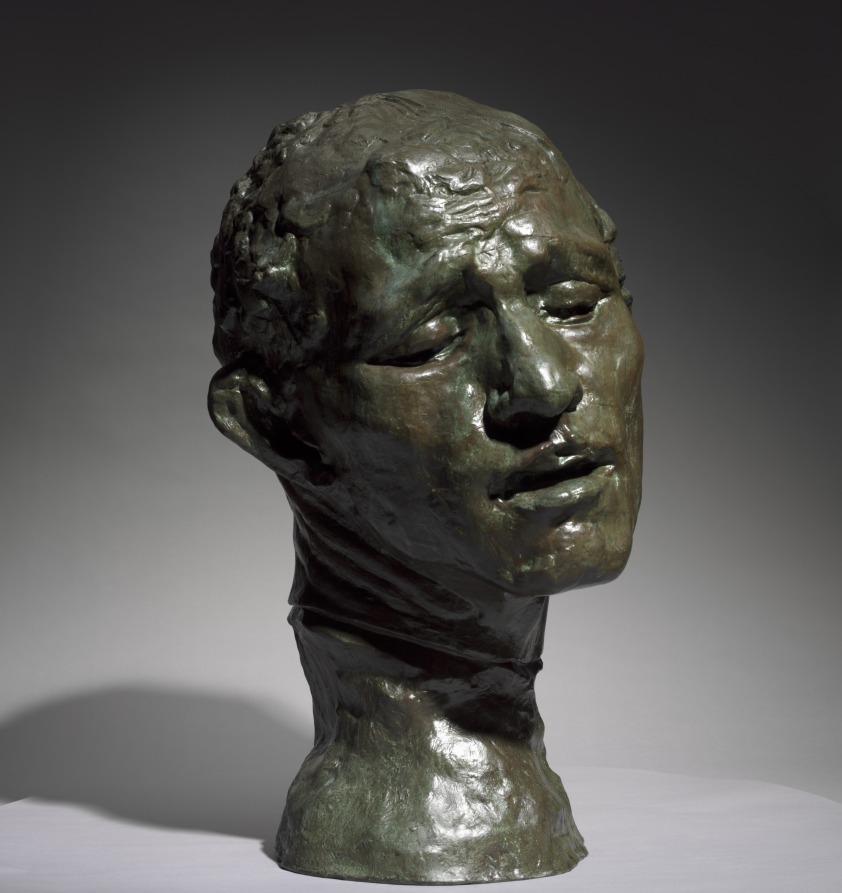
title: Heroic Head of Pierre de Wissant, One of the Burghers of Calais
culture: France, 19th century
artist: Auguste Rodin (French, 1840–1917)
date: 1886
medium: bronze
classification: Sculpture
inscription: inscribed at neck, left: A.Rodin; inscribed lower back: Alexis Rudier/Fondeur-Paris.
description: This sculpture depicts one of the figures in Rodin’s large public monument The Burghers of Calais (1884–89), featuring six French men who volunteered to be taken prisoner by the English in exchange for lifting the siege of Calais during the Hundred Years War (1337–1453). Pierre de Wissant’s anguished expression suggests extreme mental suffering as he contemplates his expected execution. Rodin exhibited a life-size version of the figure as an independent work before completing the monument. He later made multiple versions in various sizes and media.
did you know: This sculpture depicts the head of a figure from Rodin's large public monument The Burghers of Calais (1884-89). The CMA also owns a plaster version of the head.